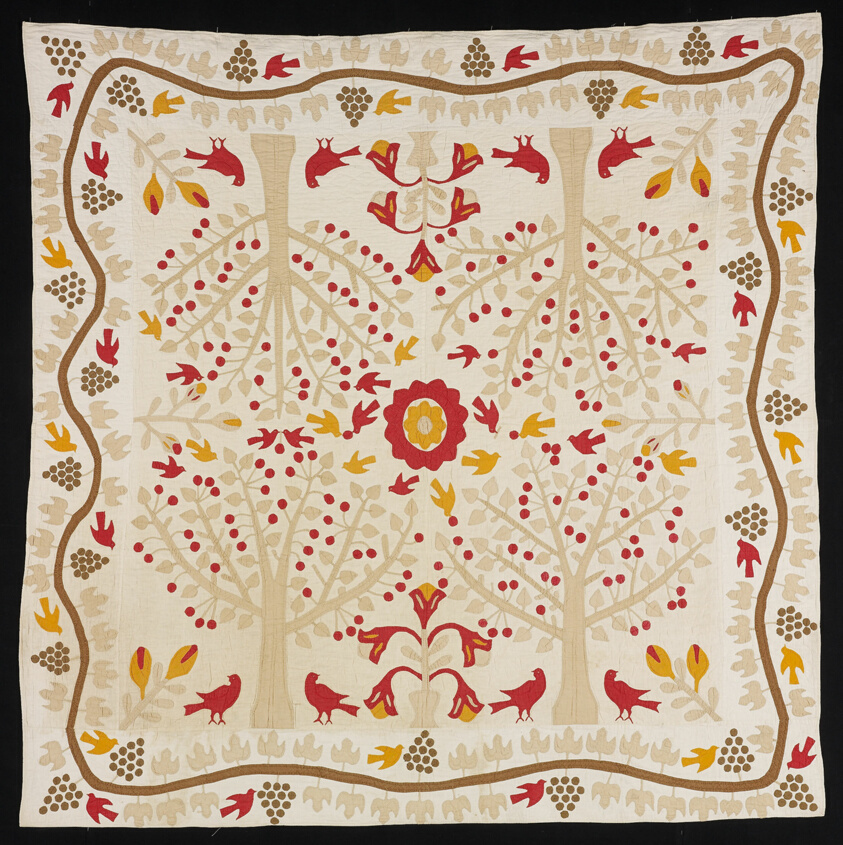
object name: Textile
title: Bedcover (Cherry Trees and Robins Bride's Quilt)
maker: United States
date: 1820/50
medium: Appliquéd quilt; dyed and undyed plain weave cotton fabrics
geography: United States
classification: textile; needlework - quilt